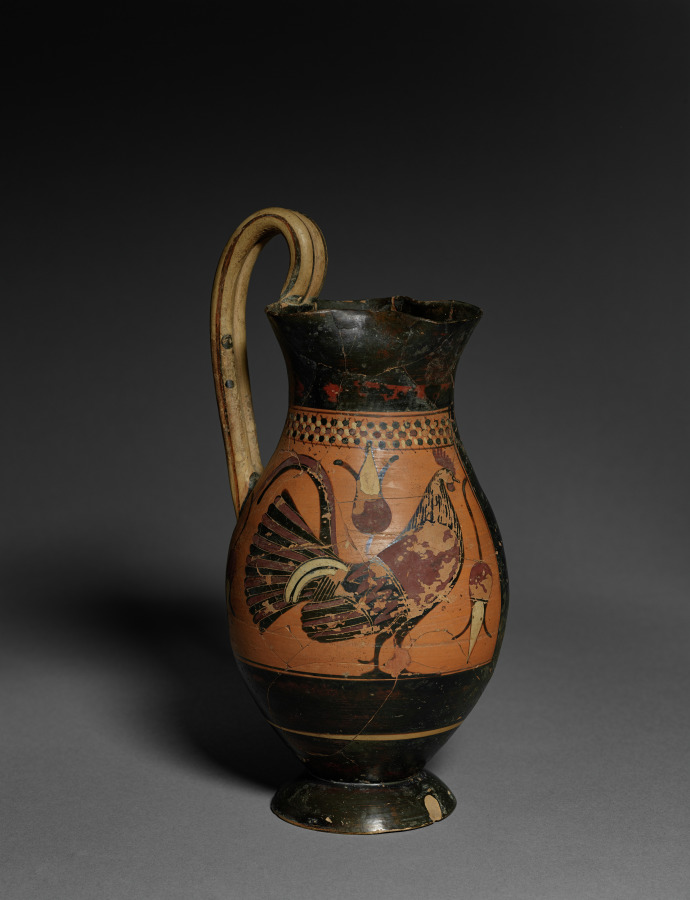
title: Black-Figure Olpe (Wine Jug): Rooster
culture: Greek, Middle/Late Corinthian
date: c. 575 BCE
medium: ceramic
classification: Ceramic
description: Although this wine jug, simply decorated with a rooster and two lotus blossoms, looks much like Athenian vases, it was made in Corinth. The paler buff color of the Corinthian clay can be seen on the handle and in some areas of loss, but the background of the decorated area has been covered with a red slip imitating the reddish, iron-rich Attic (or Athenian) clay. On the back of the vase, two reserved (red) crescent shapes may represent eyes, like those painted in much more detail on many drinking cups of this period.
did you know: Roosters appear frequently on vases—alone, in cock fights, and as love gifts.